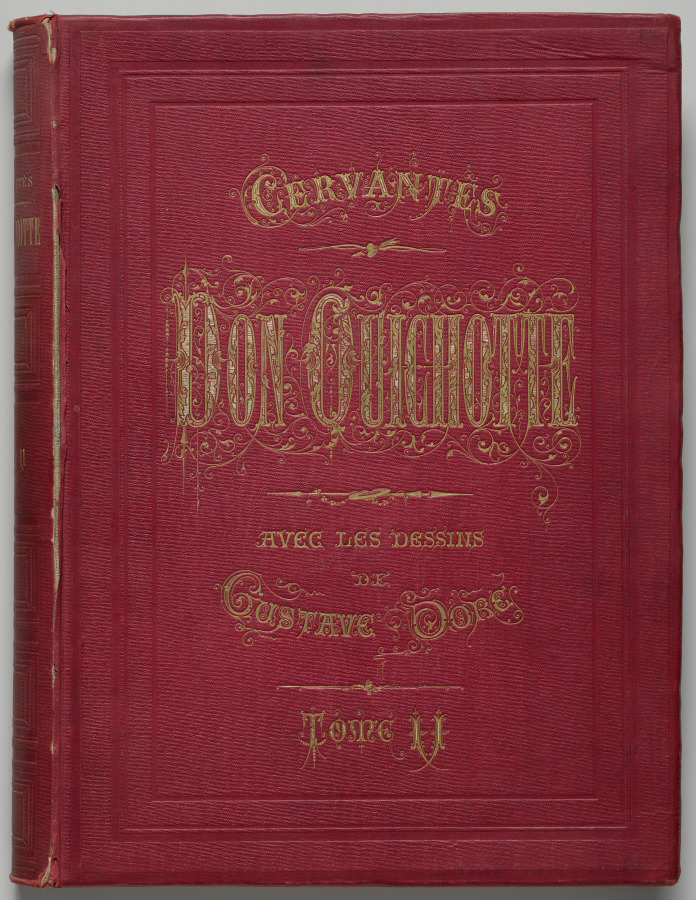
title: Don Quixote (vol II)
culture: France, 19th century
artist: Héliodore Pisan (French, 1822–1890)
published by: Hachette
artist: after Gustave Doré (French, 1832–1883)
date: 1863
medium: wood engraving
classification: Bound Volume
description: Doré wanted to illustrate the masterpieces of world literature, including Miguel de Cervantes's novel Don Quixote de la Mancha (1615). A parody of chivalric narratives popular during the 16th century, the story describes the adventures of a wandering knight, Don Quixote, and his assistant, Sancho Panza. This scene depicts Don Quixote in the enchanted cave of the Montesinos dreaming that he is shown the body of Durante, one of the greatest itinerant knights. Durante writhes on his grave, begging to be released from the burden of life. His beloved, Belerma, depicted as a ghostly shadow, hovers above the tortured Durante, holding his heart. Heliodore Joseph Pisan, a superb professional wood engraver, skillfully translated Doré's drawings into prints, retaining the dramatic tonal quality of the original. Instead of drawing on the whitened woodblock using only line, Doré used pen and ink and wash to create forms, and gouache to describe highlights. To interpret Doré's full range of grays into the black-and-white relief surface of the wood engraving, halftone effects were devised with special tools that produced very fine white lines.